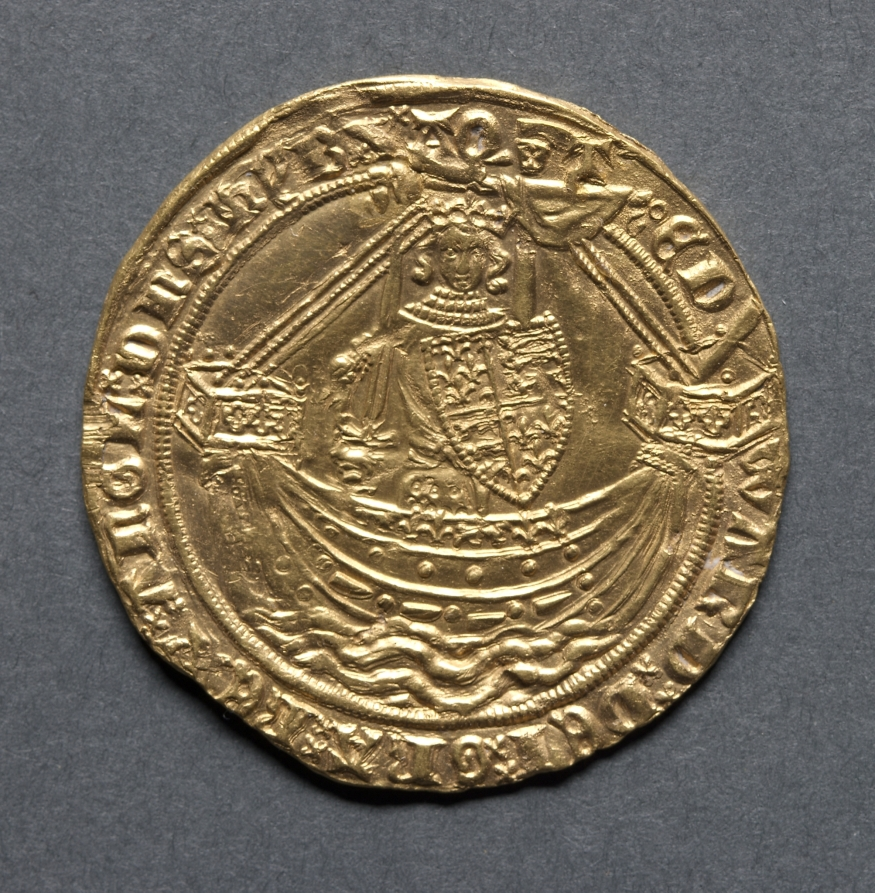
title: Noble: Edward III Standing in Ship with Shield of Arms (obverse)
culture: England, Edward III, 1327-1377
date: 1363–1369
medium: gold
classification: Coins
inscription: EDWARD DEI GRA REX ANGL DNS HYB Z AQT